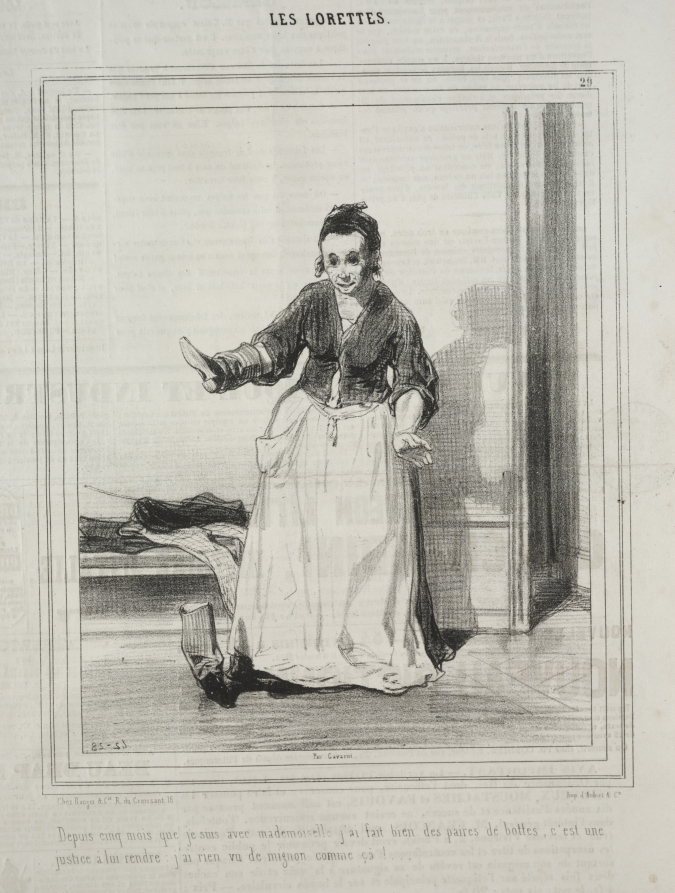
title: Les Lorettes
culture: France, 19th century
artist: Paul Gavarni (French, 1804–1866)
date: 1842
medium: lithograph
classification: Print